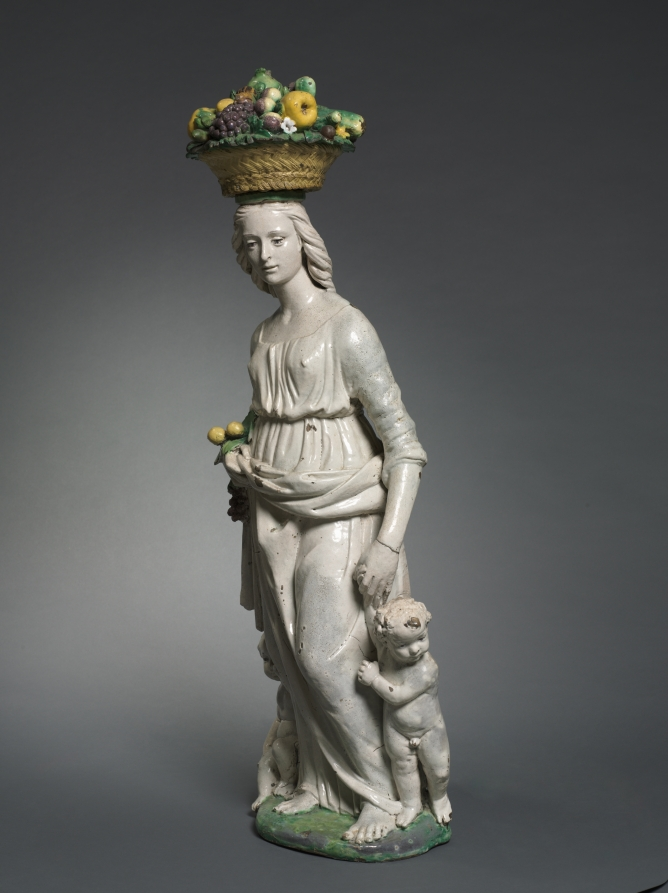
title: Dovizia (Plenty)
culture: Italy, Florence, 16th century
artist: Giovanni della Robbia (Italian, 1469–1529/30)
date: c. 1520–29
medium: glazed terracotta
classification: Sculpture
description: Many elite Florentine Renaissance homes had sculptures of idealized young women carrying nature’s bounty, such as this work. The motif stems from a statue by Donatello (about 1386–1466) that towered over Florence’s main public market. At home, however, the sculpture became a talisman for the family’s well-being. The city-state’s low birth rate was a serious political matter, and such a sculpture was believed to stimulate fertility while also promoting motherhood and bolstering financial success.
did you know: Inspired by an over life-sized, public sculpture by Donatello, Giovanni della Robbia reduced the figure for a domestic setting.